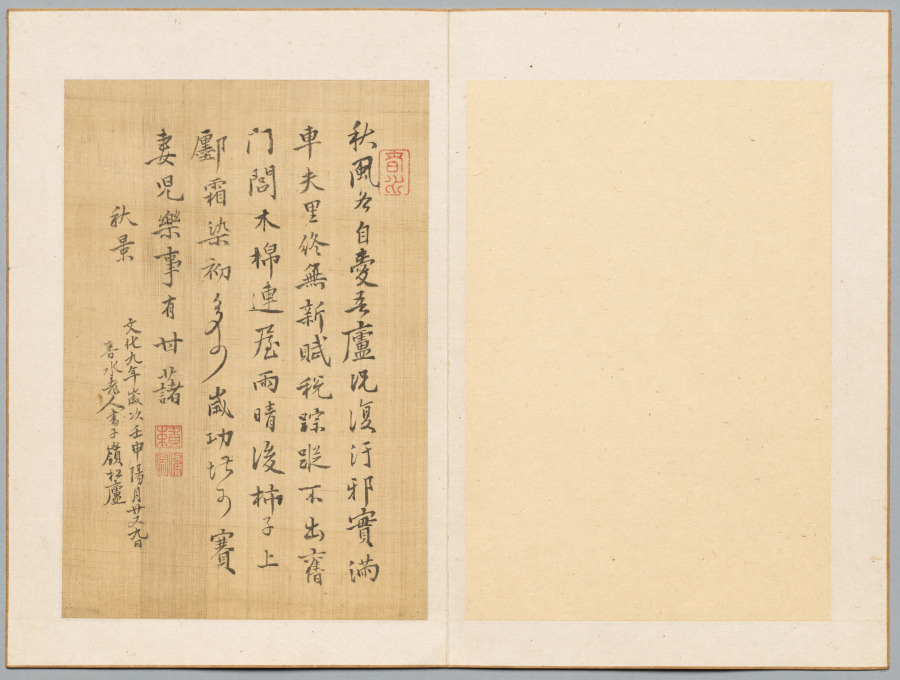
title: Poem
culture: Japan, Edo period (1615–1868)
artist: Rai Shunsui (Japanese, 1746–1816)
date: 1812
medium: leaf from a pair of folding albums; ink and light color on paper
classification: Portfolio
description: The Nanga, or "Southern School" painters of 17th- and 18th-century Japan were greatly influenced by Chinese culture. The subjects and styles of their work reflected the contemporary Japanese taste for imported Chinese objects and learning. A common practice among Nanga painters was the exchange of small paintings and calligraphies. They also celebrated special gatherings of artist-friends by producing individual sheets that were then gathered together in albums. The sheets shown here were part of such a gathering.